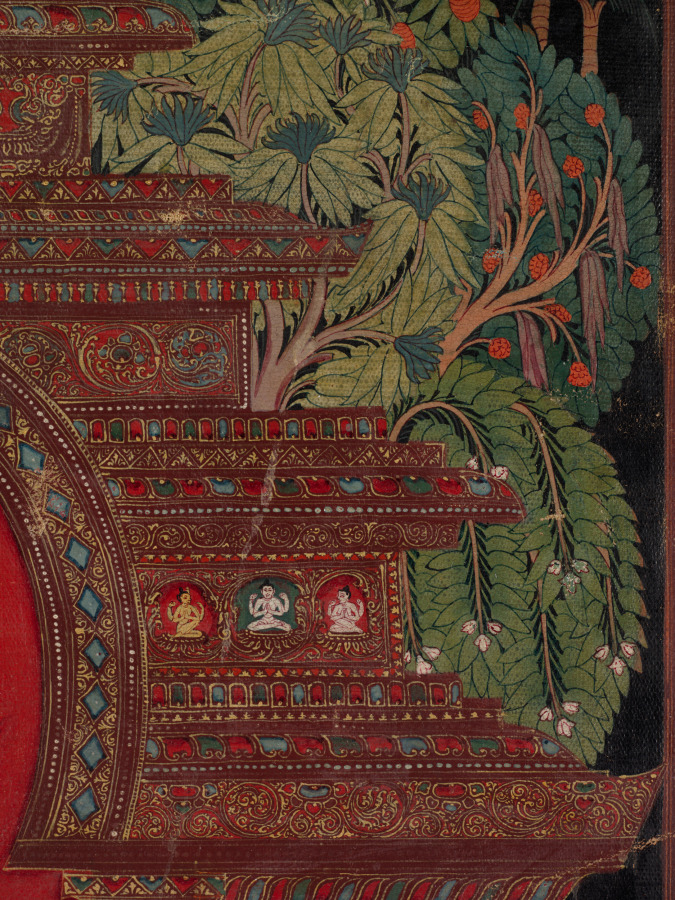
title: Green Tara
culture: Central Tibet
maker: attributed to Aniko (Nepalese, active in Tibet mid- to late 1200s)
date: c. 1260s; mounted, 2020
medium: thangka; gum tempera, ink, and gold on sized cotton; mount: silk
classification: Painting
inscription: Om Ah Hum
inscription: om tare tutare ture svaha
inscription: Om Ah Hum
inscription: Om Ah Hum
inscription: om ah sarva vyida svaha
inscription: ye dharmā hetuprabhavā he- tuṃ teṣāṃ tathāgato hy avadat teṣāṃ ca yo nirodha evaṃvādī mahāśramaṇaḥ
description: For Tibetans, Green Tara is one of the preeminent figures of their Buddhist faith, a radiant savioress who embodies the female form of the perfect, enlightened mind. The Green Tara in the Cleveland thangka—a Tibetan devotional painting on cloth—specifically dispels fear and provides protection, just like her mantra inscribed on the back side of the painting. Her green color and fear-not gesture link her to the cosmic Buddha of the North, enshrined above her head. Most scholars agree that this work was painted by the celebrated Nepalese artist known as Aniko.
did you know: The tiny monastic figure under Green Tara's right hand commissioned the painting.